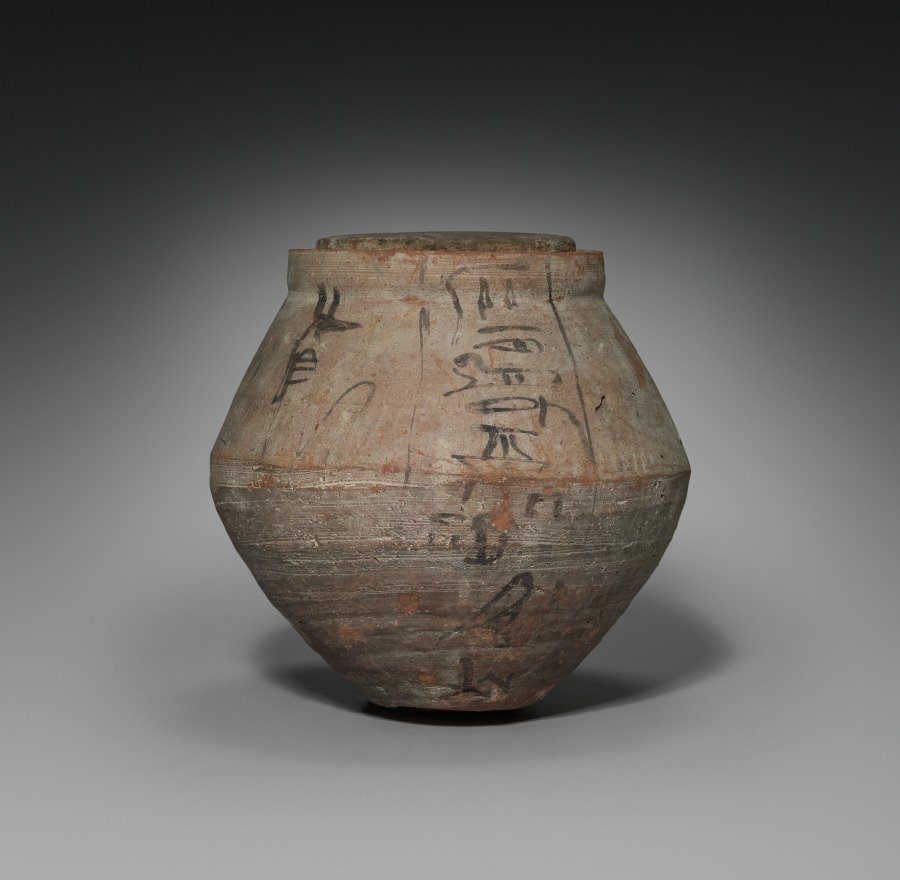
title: Shawabty Jar with Lid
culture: Egypt, New Kingdom (1540–1069 BCE), Dynasties 19–20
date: 1295–1069 BCE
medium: Nile silt ware; lid of limestone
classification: Funerary Equipment